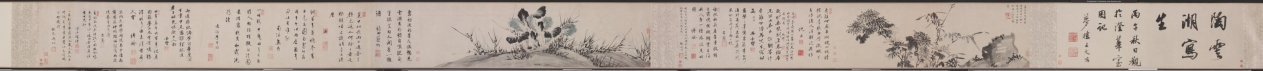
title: Chrysanthemums and Cabbage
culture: China, Ming dynasty (1368–1644)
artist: Tao Cheng (Chinese, active c. 1471–after 1502)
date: c. 1486 or before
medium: handscroll, ink and slight color on paper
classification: Painting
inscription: Artist's seal at beginning of painting: Yun hu 雲湖. Title by Wang Wenzhi 王文治 (1730–1802), date 1756. 2 seals of Wang Wenzhi 王文治 (1730-1802); 3 seals of Ku Yün (n. d.)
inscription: Section A (Chrysanthemums): 1 poem and 1 seal of Zhang Yuanzhen 張元禎 (1437–1507) - Jinshi, 1461; 1 poems and 3 seals of Ni Yue 倪岳 (1444–1501) - Jinshi, 1464; 1 poems and 2 seals of Zhao Xiang 趙祥 (life dates unknown) - Jinshi, 1469; 1 poems and 1 seals of Wu Xixian 吳希賢 (1437–1489) - Jinshi, 1464; 1 poems and 1 seals of Lü Chang 呂㦂 (1449–1511) - Juren, 1471; 1 poems and 3 seals of Fu Han 傅瀚 (1435–1502) - Jinshi, 1464; 1 poems and 1 seals of Feng Jue 馮珏 (life dates unknown) - Jinshi, 1478.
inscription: Chrysanthemums section, poem 1, by Zhang Yuanzhen 張元禎 (1437–1507): Several bushes of chrysanthemums grow in front of the Five-Willow Cottage,/ The yellow ones are really yellow and the white ones white./ This affable and decent fellow, young in years and unsophisticated,/ Has snapped one of the branches to dip in ink. (The Five-Willows Cottage was the home of the poet Tao Qian 陶潛 (Tao Yuanming 陶淵明, AD 365-427).) Chrysanthemums section, poem 2, by Ni Yue 倪岳 (1444–1501): Where at the Eastern Fence can you grieve for the Soul of the Xiang River?/ A man of upright character is mourned within the traces of ink./ White jade with a slight flaw would be a grievance forever,/ Later men should understand why even the roots of the flowers are washed. (Eastern Fence refers again to the poet Tao Qian 陶潛, while the Soul of the Hsiang River refers to the poet Qu Yuan 屈原 (c. 340–278 BC).) Chrysanthemums section, poem 3, by Zhao Xiang 趙祥 (life dates unknown): A clump of chrysanthemum grows in front of the bamboo pavilion,/ The winds of many autumns have blown since we parted beyond the river./ Straining wine through the official's cap of Tao [Qian] to prolong autumn's pleasures,/ The mists and clouds of ten thousand miles belong to the intoxicated. Chrysanthemums section, poem 4, by Wu Xixian 吳希賢 (1437–1489): It is a different spring if mulberry is planted during the latter part of the year,/ The dust of the world originally did not drop on clothing./ Who spills out ink under the Eastern Fence/ And paints so freely this portrait of chrysanthemums for the venerable Sir Tao? Chrysanthemums section, poem 5, by Lü Chang 呂㦂 (1449–1511): This full tray of ink for painting [flowers] at the Eastern Fence;/ Their whiteness or yellowness is not essential in capturing their beauty./ I don't have to go to Jiangnan to see them myself./ At my old house grow two or three branches. Chrysanthemums section, poem 6, by Fu Han 傅瀚 (1435–1502): Who daubed autumn flowers with ink/ As if they were dark dew on a branch tip only vaguely seen at evening?/ After the lazy clouds disperse, no one paints;/ A certain unconventionality pervades this painting. Chrysanthemums section, poem 7, by Feng Jue 馮珏 (life dates unknown): To satisfy his hunger, [the chrysanthemums] have at times entered the poetry of Qu Yuan;/ Taking up the wine cup, it felt close to Tao Qian./ [With them I am like] a lonely root sustained by deep water/ Or an old man to whose hair the color of youth returns.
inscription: Section B (Cabbage): 1 poem and 1 seal of Cai Qi 蔡圻 (life dates unknown) - degree information not known; 1 poems and 3 seals of Ni Yue 倪岳 (1444–1501) - Jinshi, 1464; 1 poem and 3 seals of Jiao Fang 焦芳 (1436–1517) - Jinshi, 1464; 1 poem and 3 seals of Li Dongyang 李東陽 (1447–1516) - Jinshi, 1464; 1 poems and 1 seals of Wu Xixian, signed “Xixian” 吳希賢 - Jinshi, 1464; 1 poems and 3 seals of Fu Han 傅瀚 (1435–1502) - Jinshi, 1464; 1 poems and 1 seals of Lü Chang 呂㦂 (1449–1511) - Juren, 1471; 1 poems and 2 seals of Zhao Xiang 趙祥 (life dates unknown) - Jinshi, 1469; 1 poems and 1 seals of Feng Jue 馮珏 (life dates unknown) - Jinshi, 1478.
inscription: Cabbage section, poem 1, by Cai Qi 蔡圻 (life dates unknown): The ink splashes are fresh from a frosty brush dipped in pond water;/ I can visualize that time when Yunhu 雲湖 [Tao Cheng] first showed his talents./ I lament the places where I scribbled before,/ Who would open them to inscribe a poem? (The first line is an allusion to the famous Jin dynasty calligrapher Wang Xizhi 王羲之 (AD 303-361), who practiced calligraphy so diligently at the edge of a pond that the water turned black with ink.) Cabbage section, poem 2, by Ni Yue 倪岳 (1444–1501): After rain the vegetables begin to grow;/ How are the colors of the masses lately!/ Once you get used to them, the tastiest parts are the ends of the roots;/ I don't know if they can be used for "seasoning soup." ("Seasoning soup" is an allusion to the statesmanship of a chief minister.) Cabbage section, poem 3, by Jiao Fang 焦芳 (1436–1517): This crop of purple stalks and green leaves is late and irregular;/ Now the rainy season is over for the Eastern Garden./ All the nobles nowadays dine on meat;/ Who of them knows the flavor of this [cabbage]. Cabbage section, poem 4, by Li Dongyang 李東陽 (1447–1516): It's always helped the honest man to sober up after drinks./ I intend to go to the deepest part of the stream-crossed garden/ To refresh myself in the fragrance and dew of evening. Cabbage section, poem 5, by Wu Xixian 吳希賢 (1437–1489): After rain, the white silk is filled with fragrant vegetables;/ How many times this happens in Mr. Tao's paintings./ On whom will you depend to present a memorial to the ruler?/ Don't let this color emerge on the faces of the people. (The last line is meant as a warning to officials: the color of the vegetables (green) may be pleasing in itself, but when it emerges on the faces of the starving poor, it signifies a badly governed world.) Cabbage section, poem 6, by Fu Han 傅瀚 (1435–1502): For twenty years I have feasted on the excellent mutton of an official;/ Yet I talk and dream about the garden and its vegetables./ Do not merely say it is good to chew the root of the cabbage--/ You must taste to understand what poverty is. Cabbage section, poem 7, by Lu Chang 呂㦂 (1449–1511): The capital is never a place for an apprentice in the "garden of scholarship."/ Who would write about gardens and vegetables on an examination paper?/ I've walked throughout the country in spring;/ Make sure the people don't show this color. Cabbage section, poem 8, by Zhao Xiang 趙祥 (life dates unknown): After a wash of rain, the spring garden is still in order;/ The flavor [of the cabbage] is more suitable with a small drink and the hum of a tune./ The rich and powerful in their mansions consume dish after dish of meat;/ Vegetarian food is known only by the scholars. Cabbage section, poem 9, by Feng Jue 馮珏 (life dates unknown): A new cabbage is nourished with dew;/ It takes a long time to grow and mature./ The business of "seasoning the soup" is your responsibility;/ Better command the gardener to take care [of the cabbages]. trans. HK/LYSL/WKH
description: On an autumn day in Beijing, Tao Cheng had a gathering with a group of scholar-officials and created two paintings in a spontaneous, casual style. The first depicts chrysanthemums, slender bamboo stalks, and a rock in monochrome ink. Tao applied light colors for the second painting that depicts cabbage. Tao deliberately placed the images on the first sections of the paper so that his honorable guests could add their poetic inscriptions inspired by his imagery. In the first section to the right, all seven poetic inscriptions refer to the beloved poet and recluse Tao Qian (also called Tao Yuanming, AD 365–427) who was particularly known for his profound love for chrysanthemum flowers. Most of the inscriptions in the second section express sympathy for the poor, since cabbage is the main ingredient in their humble food. Taken together, the poems and paintings allude to the life and responsibilities of the scholar-official: the importance of both an upright character and a concern for the poor citizens in order to achieve good government.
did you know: Eminent calligrapher Wang Wenzhi 王文治 was only 27 sui when he wrote the title in 1756.